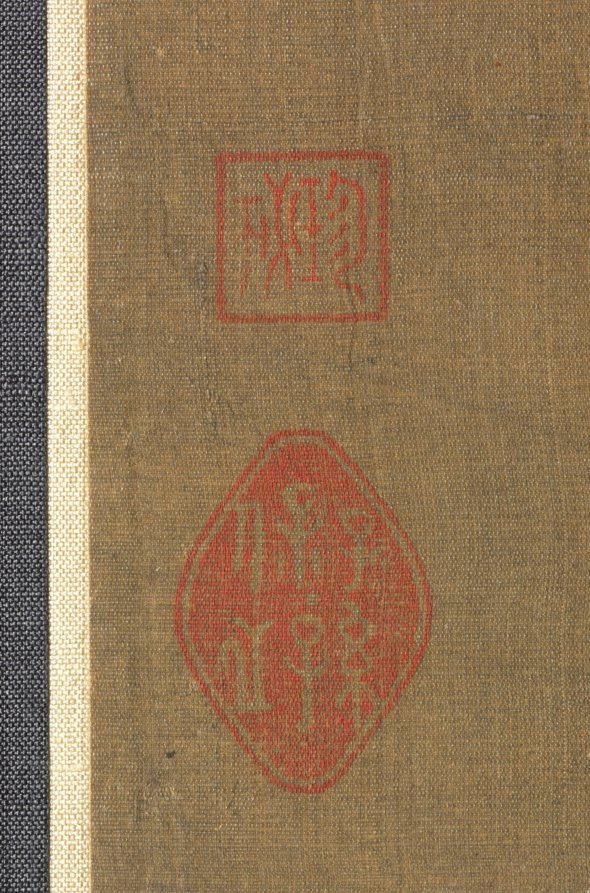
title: Buddhist Retreat by Stream and Mountains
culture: China, Northern Song dynasty (960-1127)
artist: Juran (Chinese, active 960–985)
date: 960–85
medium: Hanging scroll; ink on silk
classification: Painting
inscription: The upper portion of the scroll: the two small characters, “Ju wu 巨五”, written near the large seal. Written by a functionary in Shang Shu Sheng (the Department of State Affairs) when the painting was first received.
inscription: The upper portion of the scroll: the large seal, “Shang Shu Sheng yin 尚書省印” (seal of the Department of State Affairs)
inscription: The upper portion of the scroll: the half-seal “Si yin 司印”, seen along a border. Attributed to 典禮紀察司 of Ming dynasty.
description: Monk Juran served the Southern Tang (937–75) imperial house in Nanjing, where he studied with Dong Yuan (active 930s–60s). Both founded the southern landscape tradition, or Jiangnan school, known for gentle misty riverscapes in wet ink. Juran moved north to Kaifeng when the Southern Tang surrendered to the Northern Song, the impact of which may be seen in this painting, presumably painted after 976. A towering mountain dominates the composition, typically representing the style of the Northern Song academy; while the use of long hemp fiber strokes to texture the mountains, wet dots, and round boulders on mountain tops are elements of the southern landscape tradition.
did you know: This hanging scroll with the towering mountain is a prime example of the monumental landscape style of Northern Song.